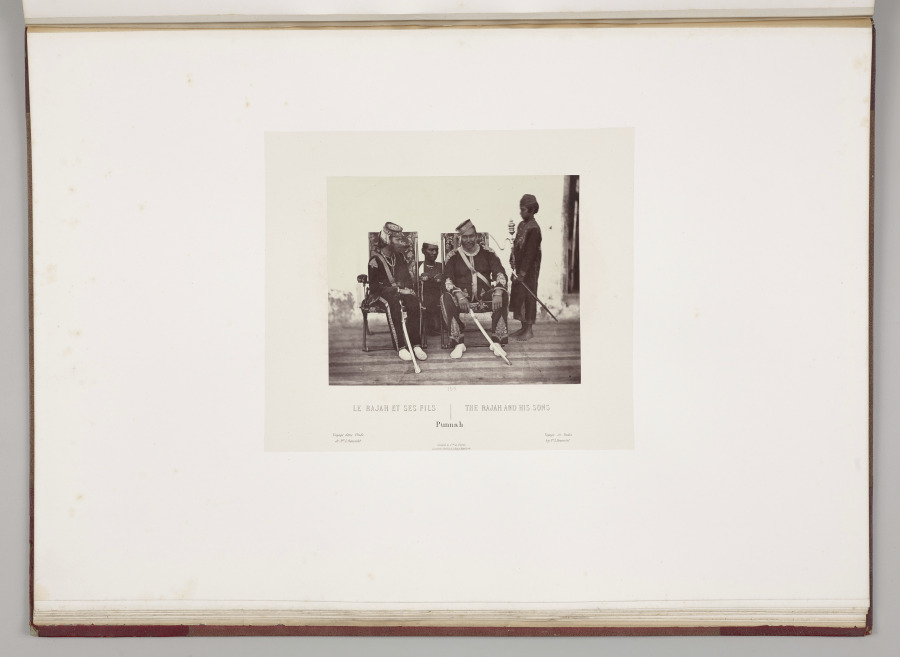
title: The Rajah and His Sons, Punnah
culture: France, 19th century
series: India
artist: Louis-Théophile Marie Rousselet (French, 1845–1929)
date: 1865–68, published 1869–70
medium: Albumen print from glass plate negative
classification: Photograph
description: Concerned that his drawings did not do justice to the splendor of India’s monuments, Rousselet learned photography in India that year, a remarkable accomplishment. He proved to be a talented photographer with a sophisticated sense of composition. The scenes in this volume sweep across sites of Sultanate, Rajput, and Mughal power in northern India, from the sacred Hindu city of Varanasi on the Ganges River to Alwar in Rajasthan. Also included are several scenes of industry and portraits of Indian rulers.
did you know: Louis Rousselet described himself as a “scientific traveler” when he went to India alone at age 18 in 1863 and stayed into 1868.